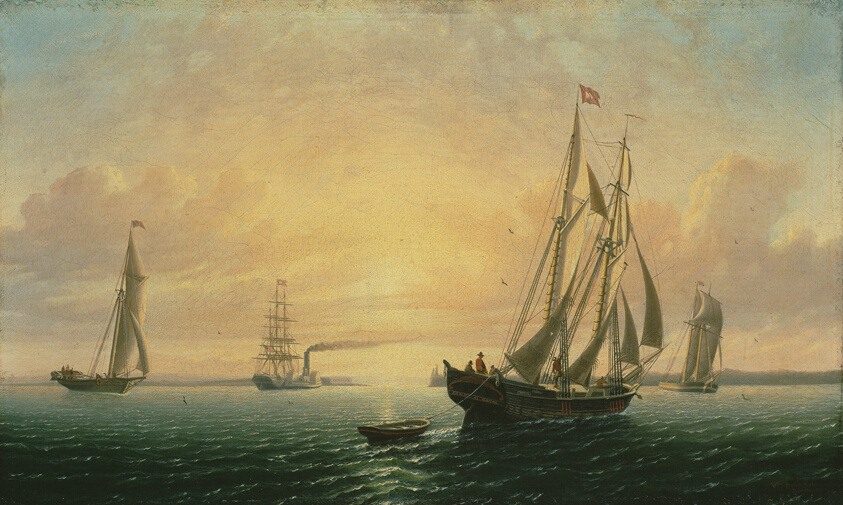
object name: Painting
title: The Schooner Jane of Bath, Maine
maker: William Bradford (American, 1823–1892)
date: 1857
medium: Oil on canvas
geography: Bath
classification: painting; american arts